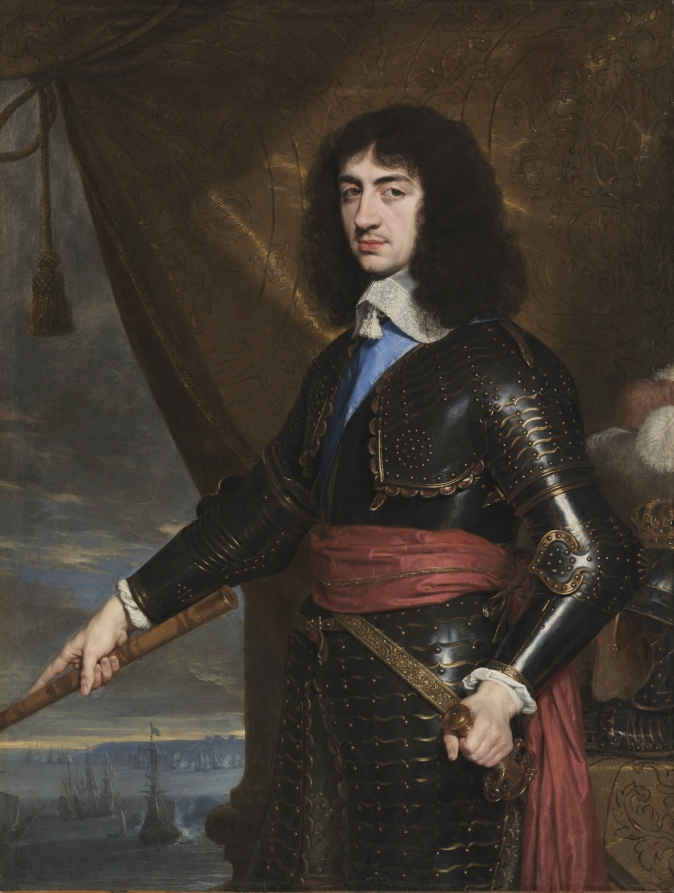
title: Portrait of King Charles II of England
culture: France, 17th century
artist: Philippe de Champaigne (French, 1602–1674)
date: 1653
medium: oil on canvas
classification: Painting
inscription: Inscribed lower center: "A°.1653"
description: Charles II (1630–1685) fled England in 1651 during the English civil war and commissioned this portrait during his exile in France. Charles II never fought on the battlefield, but he was the last British monarch to wear a full suit of armor, which represented his rank and status. The king gestures to the sea beyond the Dover cliffs, and the waiting fleet reveals his intention to return to England, which he did in 1660.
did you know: Charles is wearing a typical French cuirassier's armor. Meant for cavalry, the style indicates it was made around 1630 and was likely a gift as Charles would have been an infant at the time it was created.